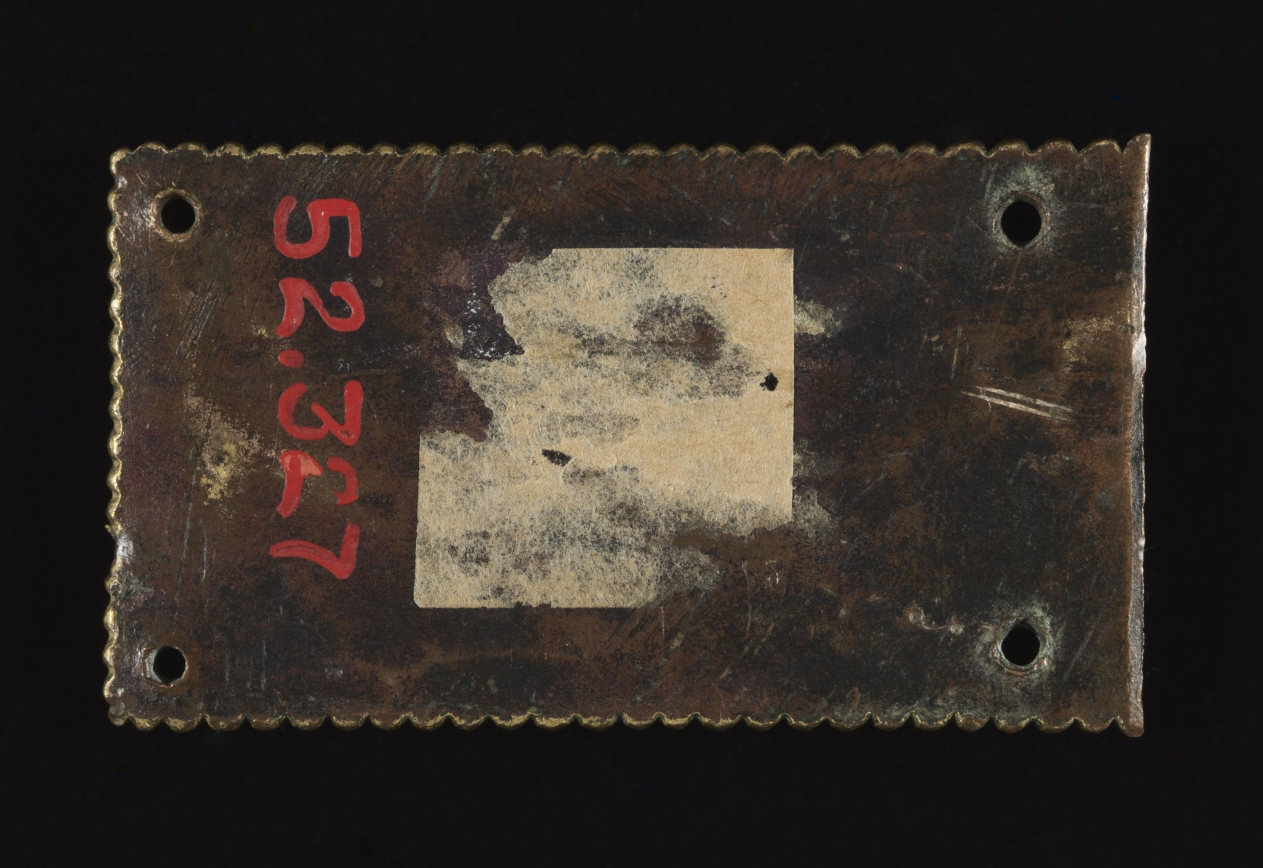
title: Plaque, probably from a Reliquary Shrine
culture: Mosan, Valley of the Meuse, Gothic period, early 13th century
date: c. 1200–1250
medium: gilded copper; champlevé enamel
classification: Enamel